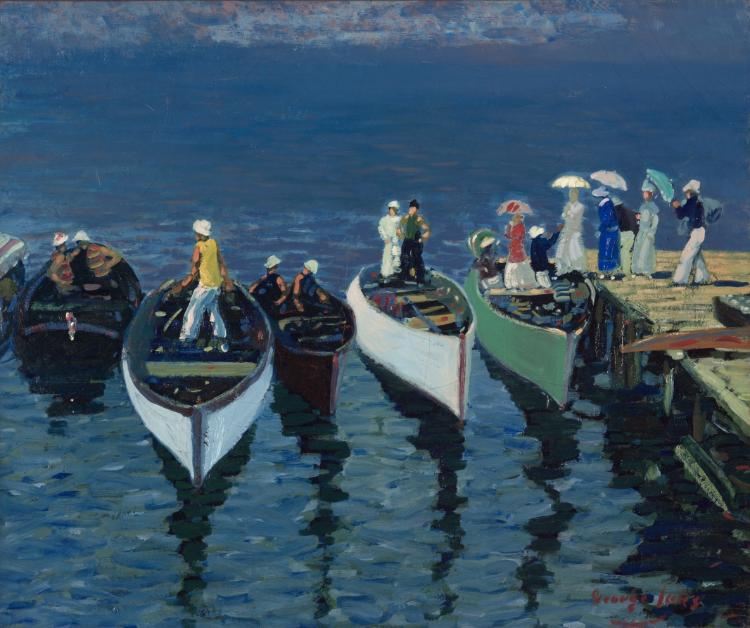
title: Holiday on the Hudson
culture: America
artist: George Luks (American, 1866–1933)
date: c. 1912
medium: oil on canvas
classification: Painting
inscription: signed lower right: George Luks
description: A sun-dappled scene of middle-class leisure, Holiday on the Hudson is an atypical work by Luks, who more often turned to gritty tenement subjects for inspiration. Throughout his career, the painter fashioned himself as a brash, profane, and hard-drinking antagonist to New York’s genteel art-world establishment. The museum purchased this work just four months before the artist was beaten to death in the wake of a speakeasy argument.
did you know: Luks often boasted about being an amateur boxing champion, but this was later revealed to be a tall tale.